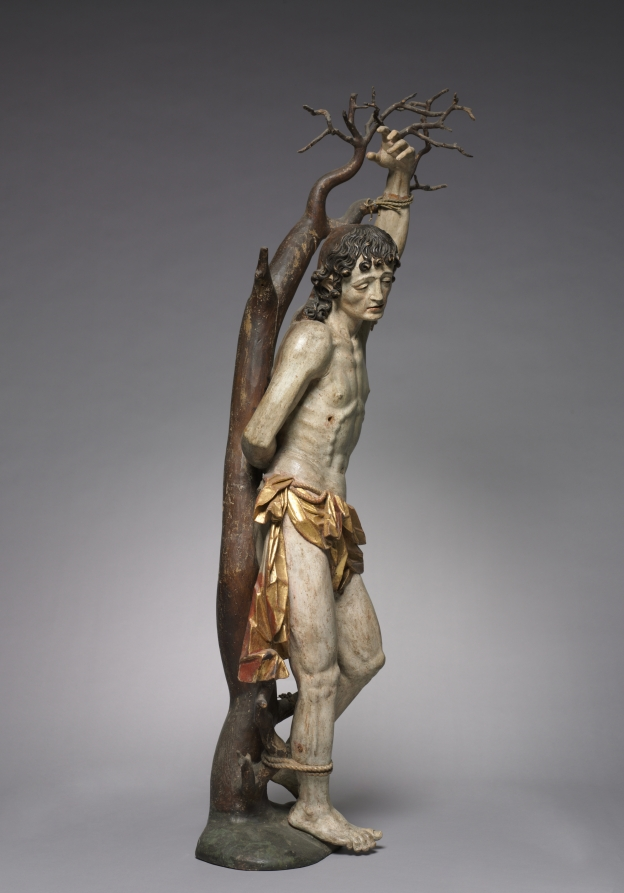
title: Saint Sebastian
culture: Germany, early 17th century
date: c. 1600–1620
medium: painted and gilded wood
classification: Sculpture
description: An early Christian saint and martyr, Sebastian was condemned to death by the Roman emperor Diocletian. Bound to a tree and shot with arrows, he survived—only later to be martyred by beating. This figure embodies the blend of stylistic influences that characterized German sculpture in the early 1600s. The graceful pose and anatomical naturalism of the legs indicate the influence of Italian Mannerism, while the crisp, stylized patterns of Sebastian’s hair and loincloth recall German Gothic works from the 1400s. The tree to which Sebastian is bound is an actual branch, shaped and refined to its present appearance.